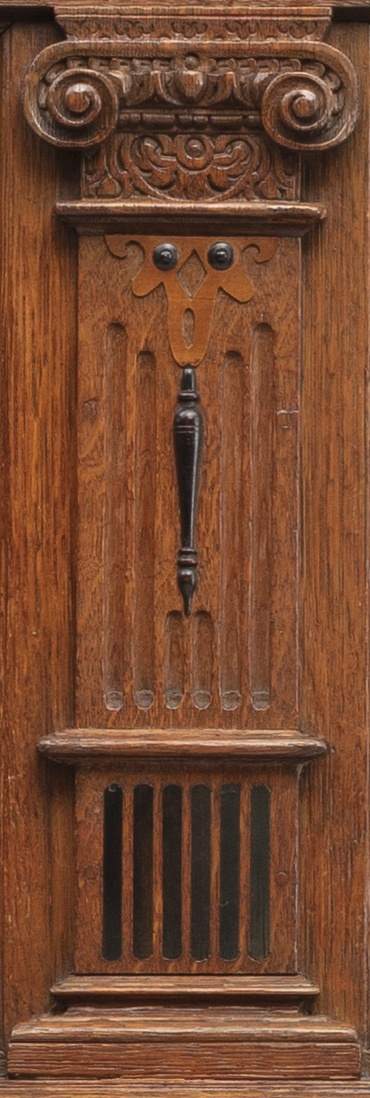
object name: Furniture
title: Linen Cupboard (Kast)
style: Baroque, Mannerism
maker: The Netherlands, probably Amsterdam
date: 1630/50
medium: Oak, pearwood, hardwood, paint, iron, and brass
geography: Netherlands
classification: furniture; decorative arts; functional object; furnishings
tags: lions, animals, architecture